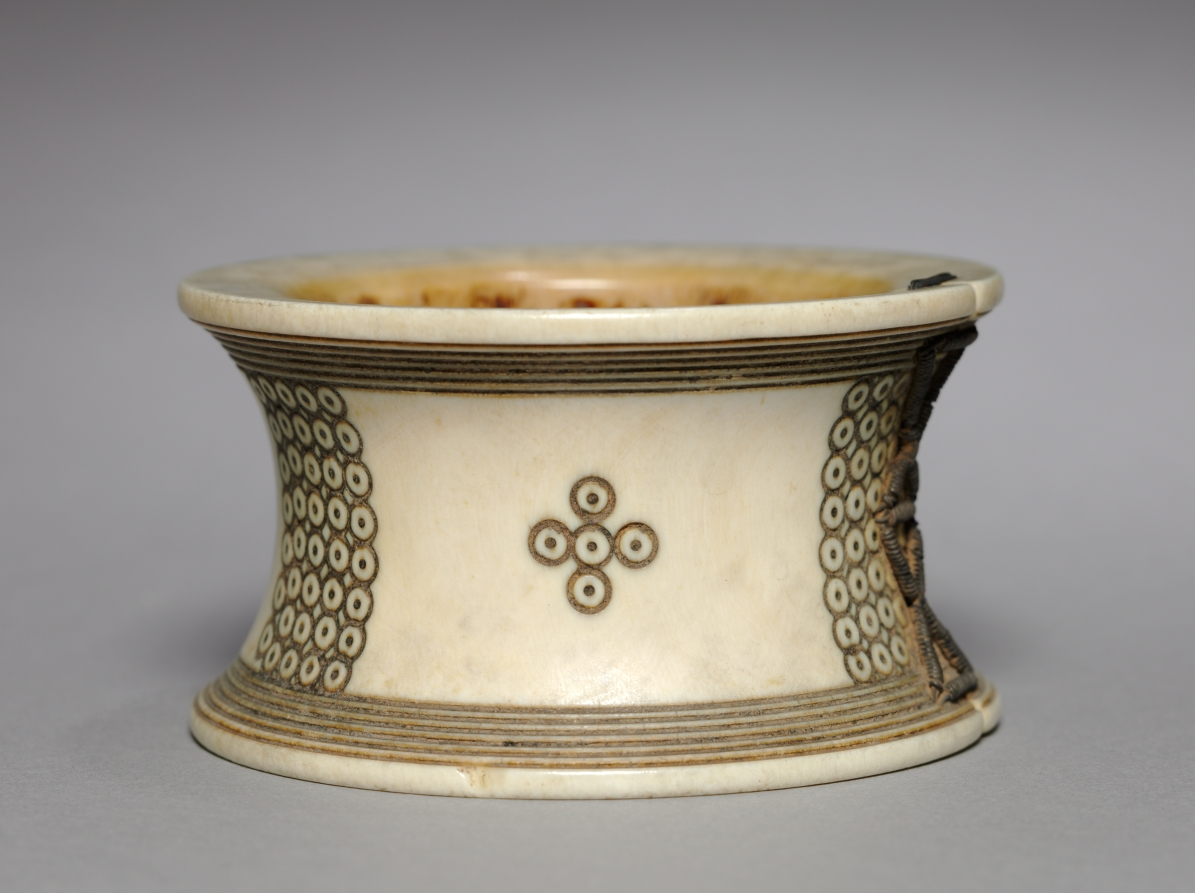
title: Bracelet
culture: Africa, Central Africa, Democratic Republic of the Congo, Kuba-style maker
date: c. 1900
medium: Ivory and wire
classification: Jewelry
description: This ivory bracelet is simple, yet elegant. Note how the delicate wire repair by a Kuba artisan adds a counterpoint pattern to the original design.